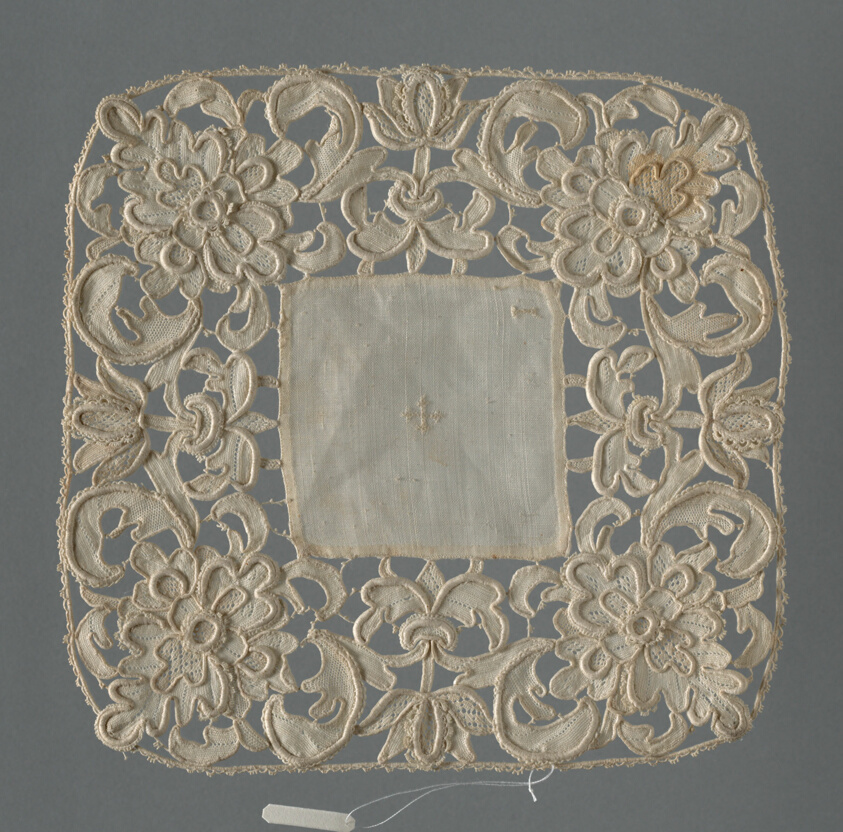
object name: Textile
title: Chalice Cover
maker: Probably Italy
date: Late 19th century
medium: Linen, plain weave, embroidered in chain and cross stitches; edged with needle lace; with raised details in immitation of Venetian needle lace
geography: Italy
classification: textile; needlework (visual works)